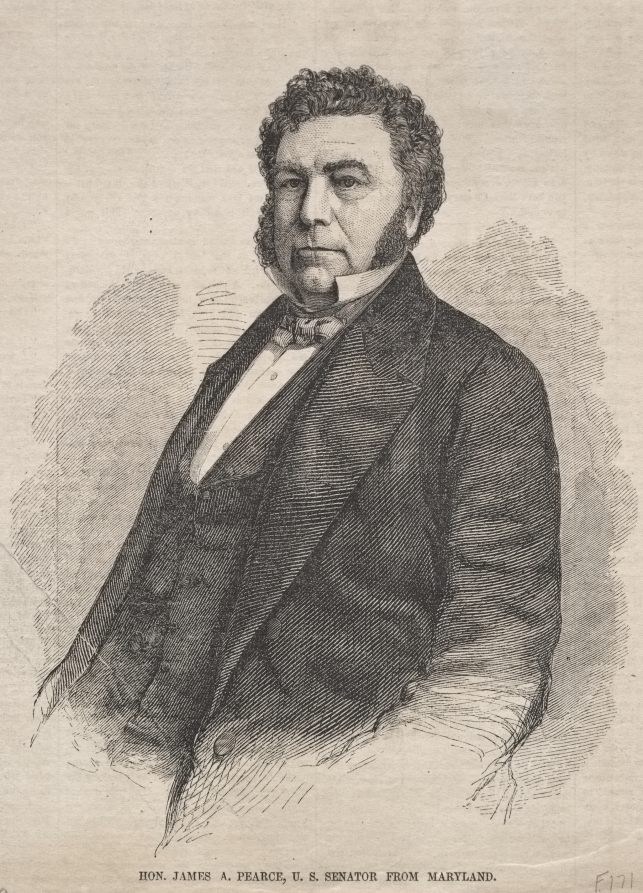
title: Hon. James A. Pearce, U. S. Senator from Maryland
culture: America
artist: Winslow Homer (American, 1836–1910)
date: 1859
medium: wood engraving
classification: Print